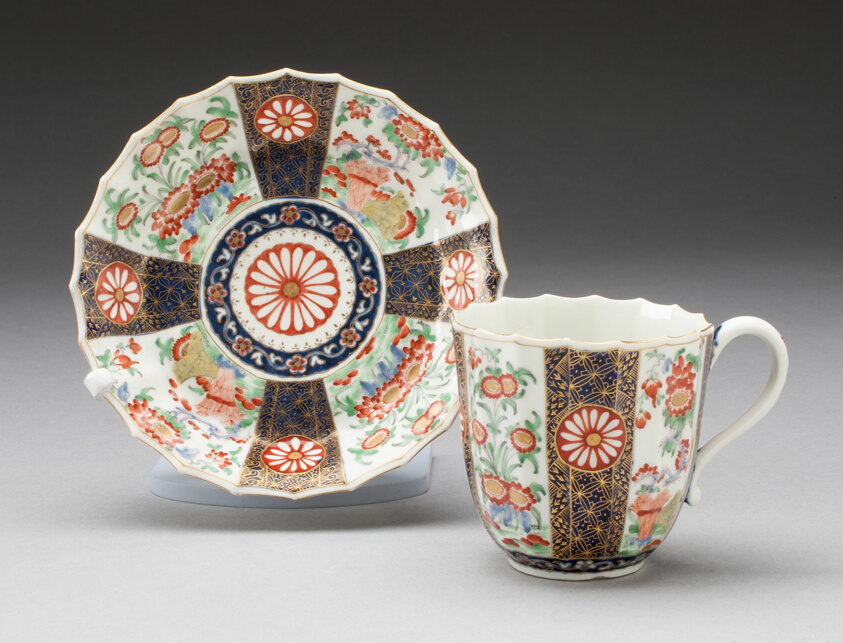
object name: Ceramics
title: Cup and Saucer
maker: Worcester Porcelain Factory (Warmstry House Period, 1751–1783); Worcester, England, founded 1751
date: c. 1775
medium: Soft-paste porcelain with polychrome enamels and gilding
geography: Worcester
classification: drinking vessel; teaware; ceramics; porcelain; european decorative arts